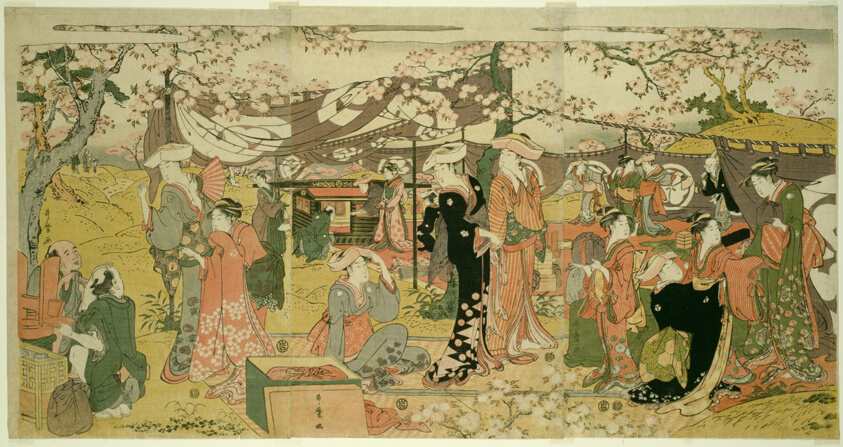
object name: Print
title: Cherry Blossom Banquet (Oka no utage)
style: Japanese (culture or style)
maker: Kitagawa Utamaro 喜多川 歌麿; Japanese, 1753 (?)-1806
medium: Color woodblock prints; oban triptych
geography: Japan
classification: woodblock print; print; asian art